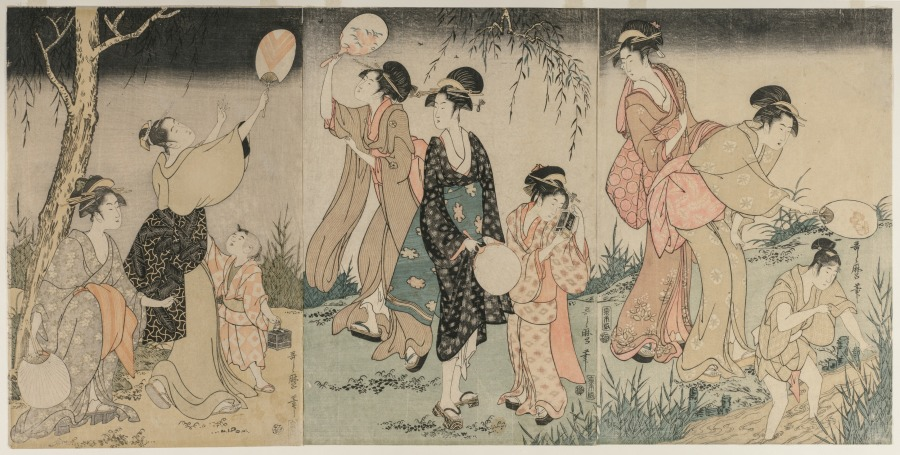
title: Catching Fireflies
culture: Japan, Edo period (1615–1868)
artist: Kitagawa Utamaro (Japanese, c. 1754–1806)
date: c. 1796–97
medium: Triptych of woodblock prints; ink and color on paper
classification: Print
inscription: Artist's signature: Utamaro hitsu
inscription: Publisher: Izumiya Ichibei (Senichi han). Censorship seal: kiwame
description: Caught up in a frenzied pursuit of fireflies, one boy has waded into a stream after his quarry, while a younger one watches in anticipation as a young woman thrusts her fan into the air in the hope of capturing hers. In the center of the composition, a girl examines the insects trapped in her elegantly carved cage.